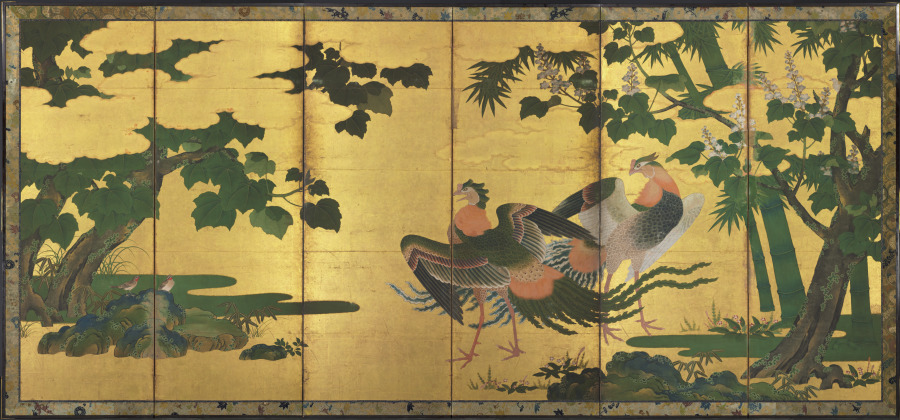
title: Phoenixes and Paulownia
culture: Japan, Momoyama period (1573–1615)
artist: attributed to Tosa Mitsuyoshi (Japanese, 1539–1613)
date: late 1500s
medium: One of a pair of six-panel screens; ink, color, and gold on gilded paper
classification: Painting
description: The immense heraldic birds on display in these byøbu reflect the Momoyama era's spirit of newly gained self-confidence and an affinity for grand expressive statements in painting, architecture, the textile and ceramic arts, as well as garden design. While that period preceded the arrival of prosperity, it clearly marked an extra---ordinary moment in Japanese cultural history, one frequently compared with the twelfth century of the Heian period. Through the extensive use of gold-foil backgrounds rather than the somber palette of carefully orchestrated ink tones evident in Muromachi byøbu, patrons colla-borated with artists as well as craftsmen in fostering a decidedly new look in much of Japanese painting. Here for instance there is no imaginary vista suggesting China's vast waterways and mountain ranges. The setting is composed instead of highly stylized lozenges of mineral green paint, suggesting the earth from which clumps of grass, flowering plants, and towering bamboo and paulownia trees emerge. Clusters of lumpy, blue-green rocks dotted with lichen provide stabilizing three-dimensional foils for these islands of vegetation as well as the all-encompassing flat, golden surface. The glorious artificiality of the setting precisely serves the artist's effort to compose a credible yet other-worldly vista for depicting the legendary phoenix gazing across the landscape at the pair of peacocks. Rather than an emblem of immortality, as it is in Western lore, in Japan the phoenix evolved out of its origins in Chinese mythology to become, by the sixteenth century, an auspicious symbol of political authority. Together with clusters of the distinctively shaped paulownia leaves, this long-tailed, mythical bird graced lacquerware as well as mural paintings, proclaiming an air of graceful com-mand. A characteristic infusion of temporality has been included also, through a seasonal flowering schema extending from spring to early summer (right) to fall and the advent of winter (left). Although traditionally attributed to the Tosa school master Tosa Mitsuyoshi (1539-1613), these byøbu possess neither seals nor signatures to confirm that authorship. Known for his jewel-like, modest-sized album paintings of courtly narratives such as The Tale of Genji, it is likely both studio training and contemporary fashions in patronage conspired to produce a good number of such byøbu. This example from the Momoyama era represents one such effort from a masterful Tosa painter, too little seen in Western collections.